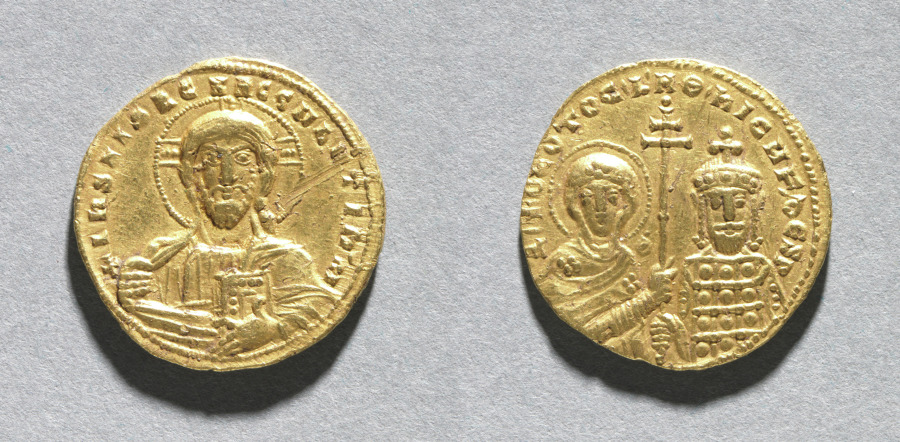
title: Nomisma with Nicephorus II Phocas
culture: Byzantium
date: 963–969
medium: gold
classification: Coins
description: The vast number of surviving Byzantine coins attests to the level of trade across the empire. Controlled and supervised by the emperor, the producers of coins took care to represent his authority and reflect his stature. Talented artists were recruited to engrave the dies (molds) used for the striking of coins. Emperors increasingly came to include their heirs and co-emperors on their coinage, as well as other family members or even earlier rulers. Coins were recognized, then as now, as small, portable works of art. With their inscriptions and images, Byzantine coins provide valuable documentation of historical events and a record of the physical appearance of the emperors. The coins shown here include the solidus, the basic gold coin of 24 karats; the tremissis, a gold coin of one-third the weight and value of the solidus; and the nomisma, which in the 10th century replaced the solidus as the standard gold coin.